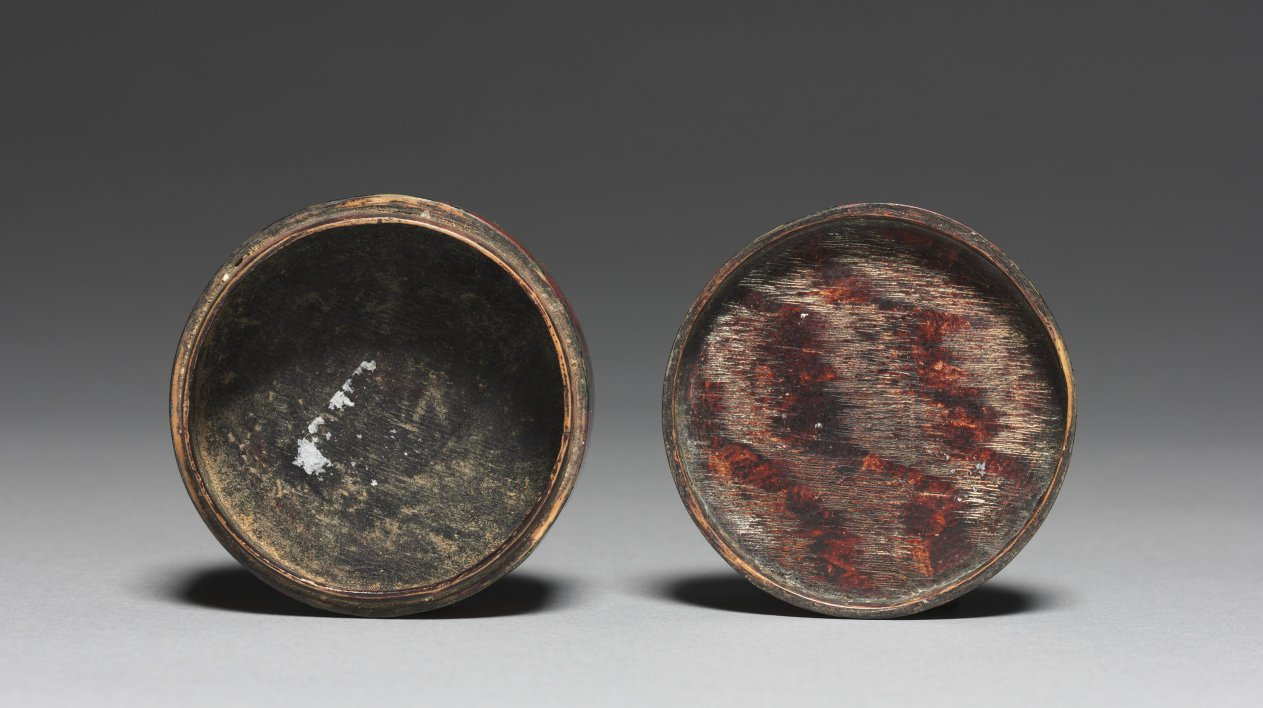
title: Incense Box with Dragon Design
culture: Korea, Joseon dynasty (1392–1910)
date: 1900s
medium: Painted wood with flattened ox-horn inlay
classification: Miscellaneous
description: This incense box is colorfully decorated with the technique of oxhorn plating. The oxhorn was cut, soaked in water, boiled, and then pressed into thin translucent sheets. Since oxhorns are usually rather small, dozens of them were required to fully decorate even a small wooden object. The lid of this container is colorfully illustrated with the imagery of a dragon amid clouds deemed as an auspicious symbol, and its side presents flying dragon and phoenix following one after another.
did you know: This box is made of small flattened pieces of oxhorn. Since oxhorn is rather small, possibly dozens of them were used to fully decorate even a small wooden object like this box.